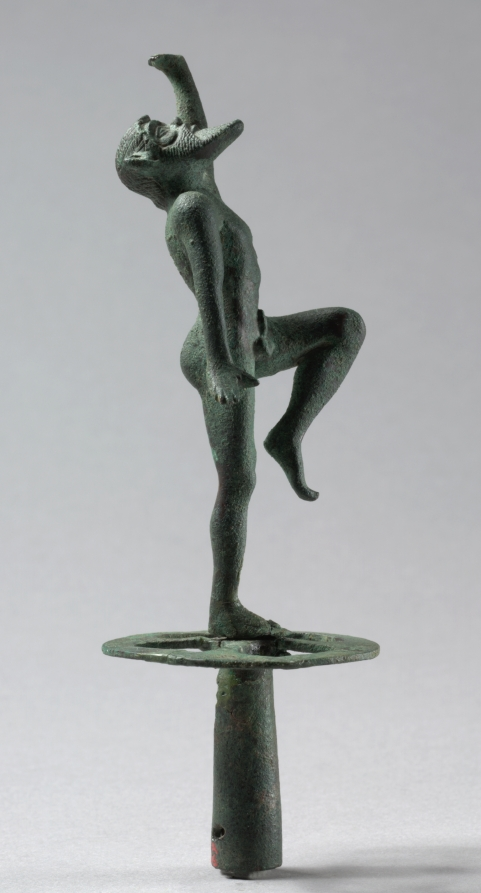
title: Kottabos Element of a Dancing Satyr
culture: Etruscan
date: 470–450 BCE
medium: bronze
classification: Sculpture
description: This diminutive dancing satyr, identifiable by his snub nose and equine ears (though without a tail), lifts his leg and reaches with an upstretched arm toward a dish, now lost. The disc and cylinder on which he stands likely rested atop a much taller post, with a larger disc or dish below, as preserved in more complete examples and illustrated on numerous ancient vases. In the drinking game kottabos, known by its Greek name but also popular in Etruria, the goal was to knock a dish off its precarious perch, in this case the hand of the dancing satyr, using only the wine dregs in your cup.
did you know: This lively object was likely used to play a drinking game called kottabos.